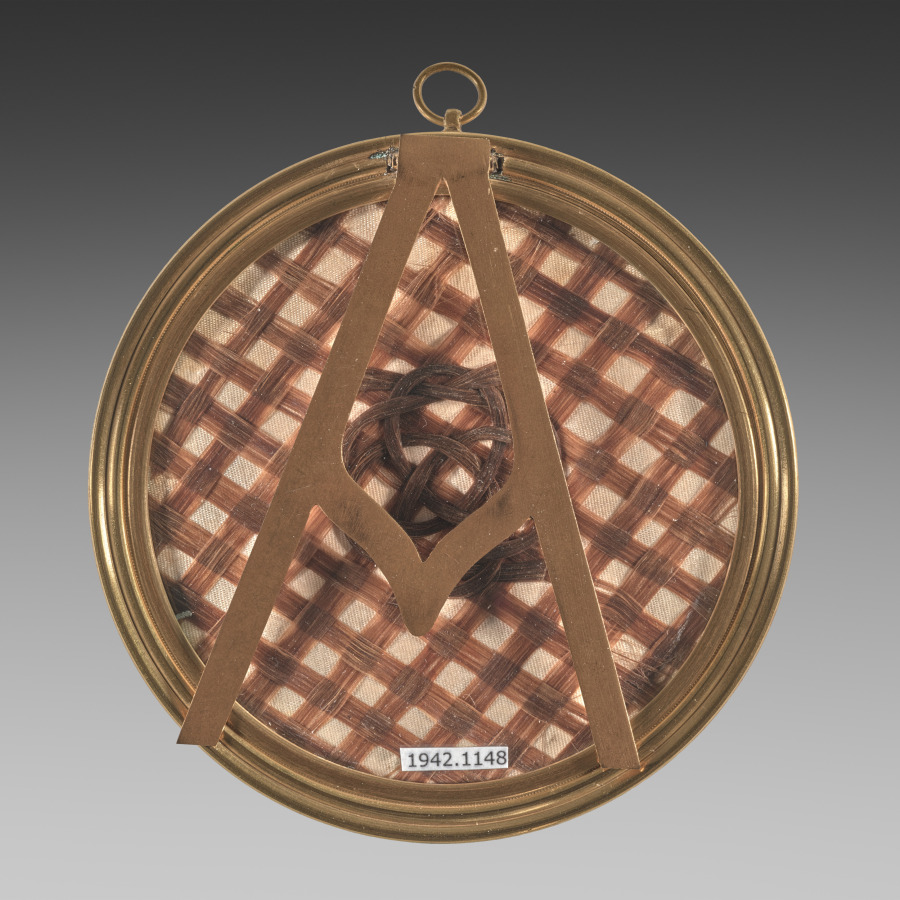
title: Portrait of a Woman Reclining on a Sofa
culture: France, 18th century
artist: Jean-Antoine Laurent (French, 1763–1832)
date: c. 1804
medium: watercolor on ivory in a gilt metal frame circa 1805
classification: Portrait Miniature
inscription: signed right: L